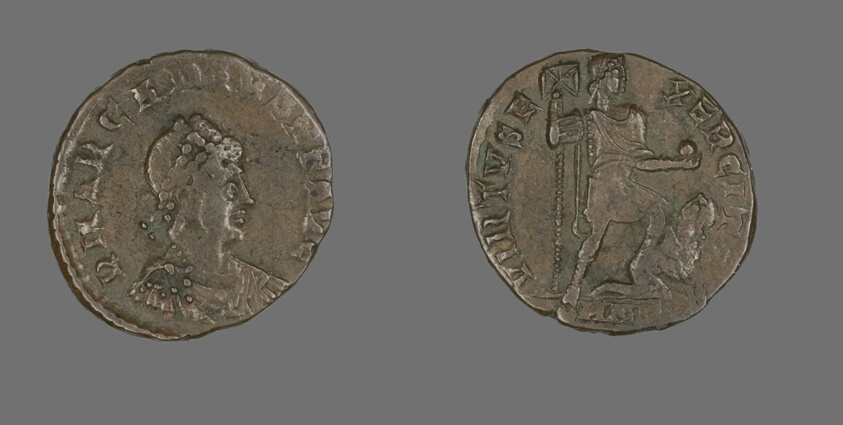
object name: Coin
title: Coin Portraying Emperor Arcadius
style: roman (ancient, style or period), ancient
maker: Roman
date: 383-408 CE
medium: Bronze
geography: Roman Empire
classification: coin; ancient art